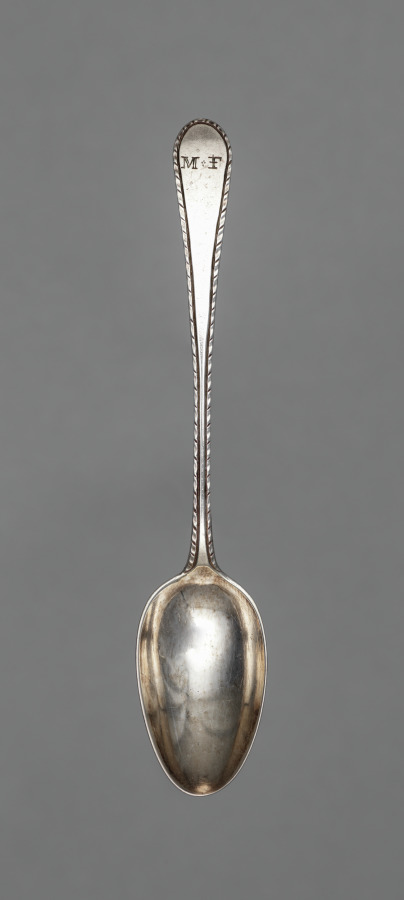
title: Teaspoon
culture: America, New Hampshire, Portsmouth, 18th century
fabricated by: Samuel II Drowne (American, 1749–1815)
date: c. 1770–1780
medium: silver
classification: Silver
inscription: engraved "M+F" in block letters on top of handle end, and "D.F.Wentworth" (later) in script on back of handle end.